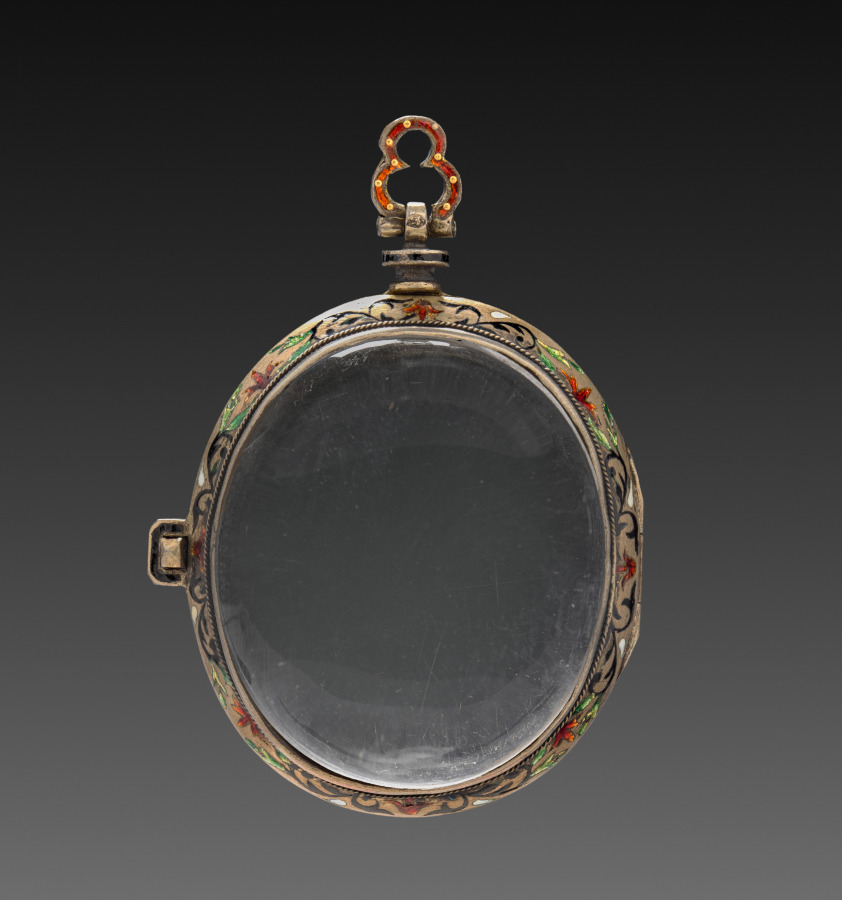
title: Watch Case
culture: Italy, 17th century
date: 1600s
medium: crystal, gilt metal, enamel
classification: Jewelry